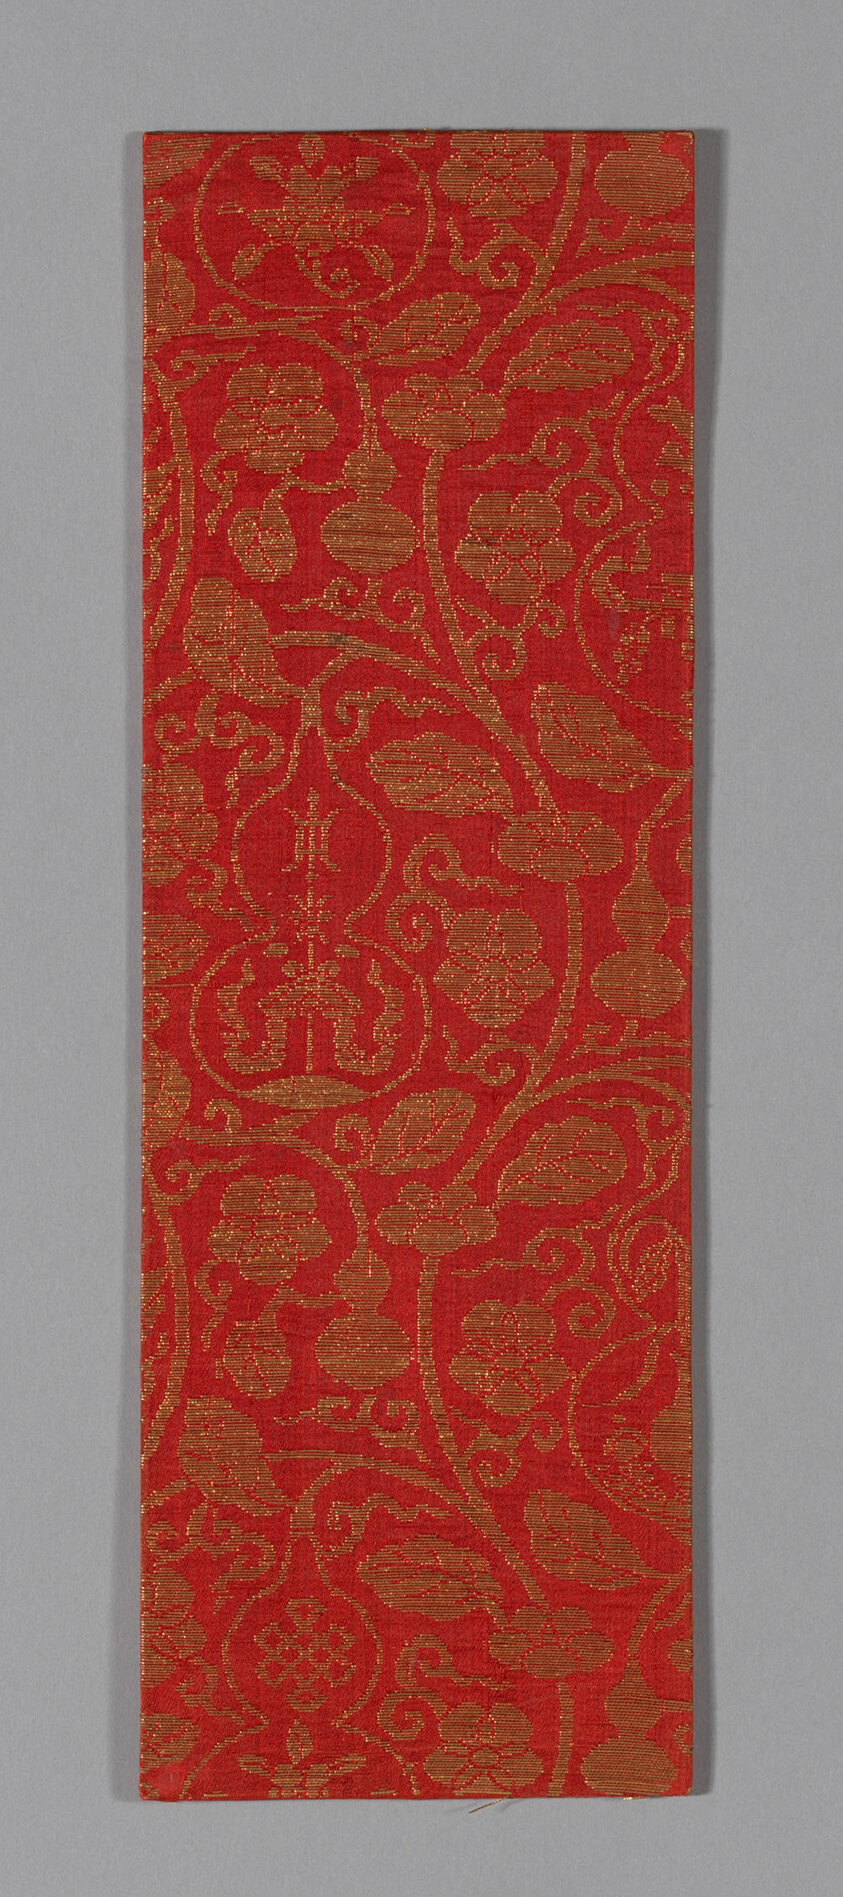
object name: Textile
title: Sutra Cover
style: ming, Chinese (culture or style), East Asian, asian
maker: China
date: Ming dynasty (1368–1644), c. 1590's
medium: Silk, gold-leaf-over-lacquered-paper strip, warp-float faced 4:1 satin weave with supplementary patterning wefts bound in weft-float faced 1:4 satin interlacings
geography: China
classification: textile; weaving